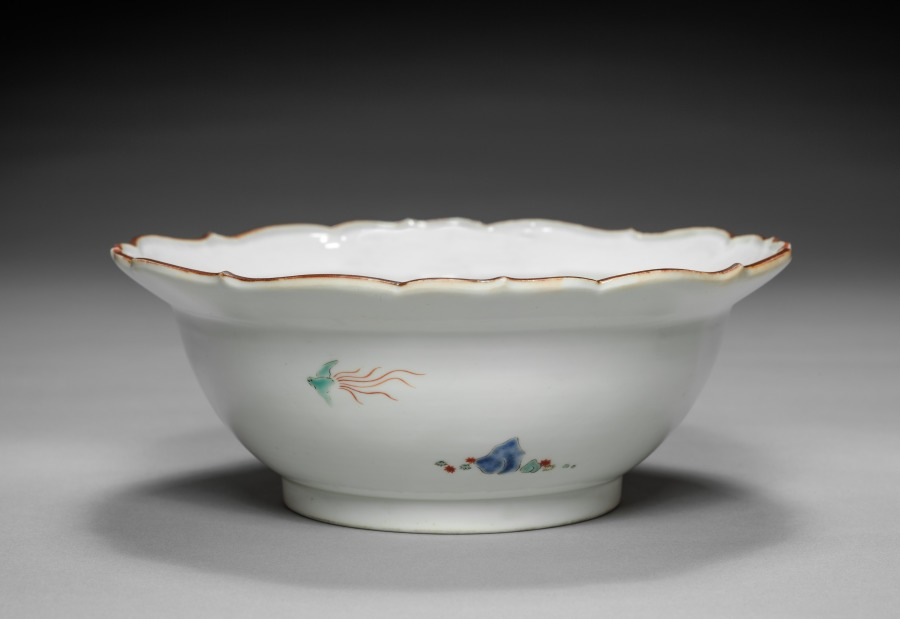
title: Deep Bowl with Dragons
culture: Japan, Edo period (1615–1868)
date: 1700s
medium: porcelain with overglaze color enamel and molding (Hizen ware, Kakiemon type)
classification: Ceramic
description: Graced with energetic dragons amid clouds, this deep bowl has a petal-shaped rim. The coiled position of the dragon in the center and the chasing action of those on the sides contribute to a sense of circular motion. The exterior shows a running figure and two birds in flight, echoing the movement in the interior.